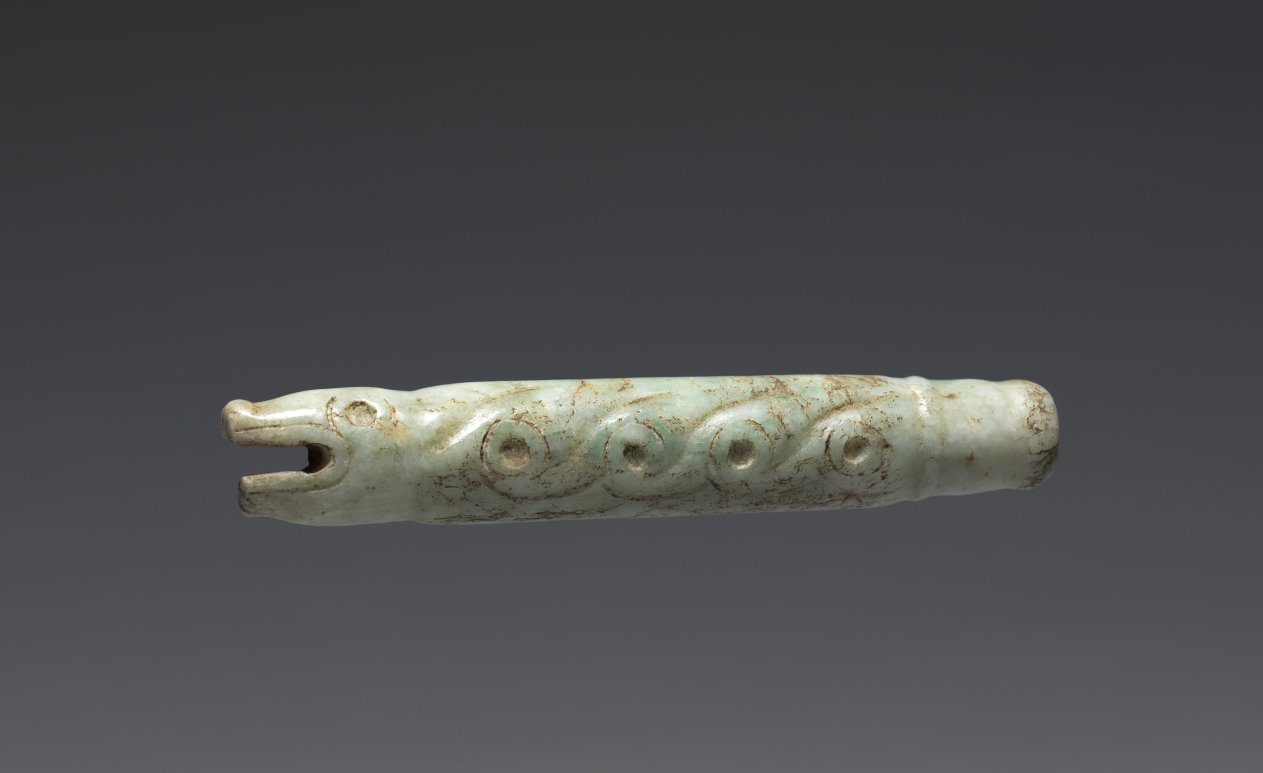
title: Serpent-form Fan Handle(?)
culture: Central Mexico, Mixtec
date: 900–1519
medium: pale green jade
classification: Sculpture